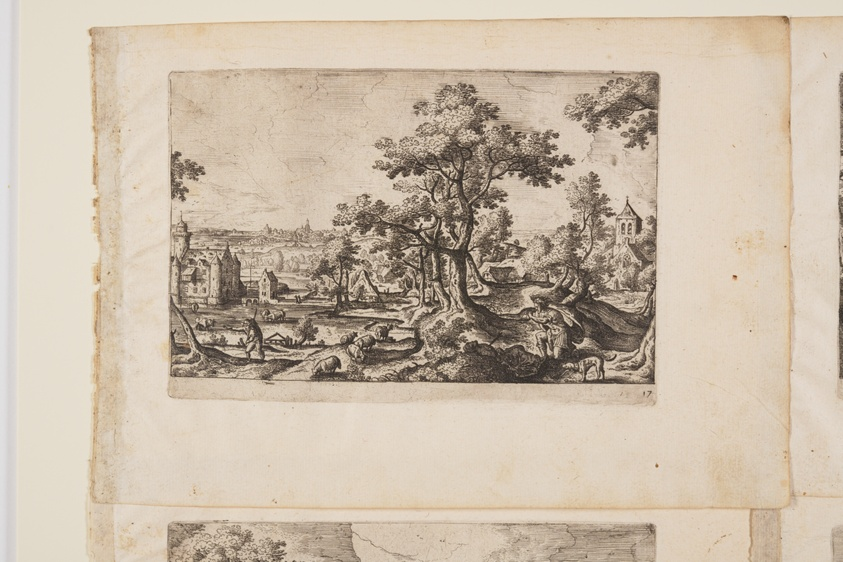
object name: Print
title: Plate 17, from Landscapes with Scenes from the Old and New Testament and Ovid’s Metamorphoses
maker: Hans Bol (Flemish, 1534–1593); published by Philip Galle (Flemish, 1537–1612)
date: 1574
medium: Etching on ivory laid paper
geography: Flanders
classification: print; paper; prints and drawing; etching